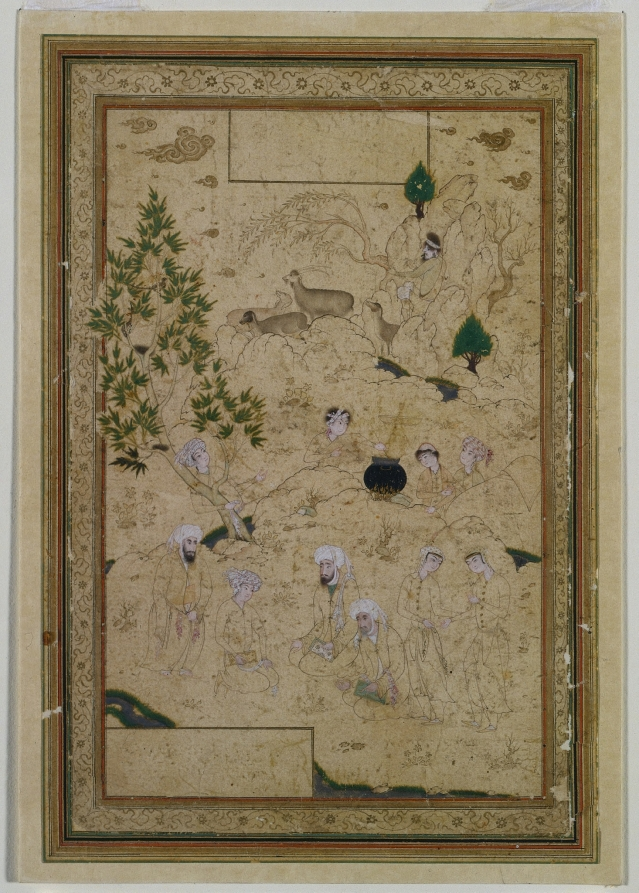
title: Picnic in the Mountains; Single Page Illustration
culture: Iran, Qazvin, Safavid period (1501-1722)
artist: style of Muhammadi (Iranian)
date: c. 1550–1600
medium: opaque watercolor, ink, and gold on paper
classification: Manuscript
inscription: script: none (cartouches for calligraphy are empty)